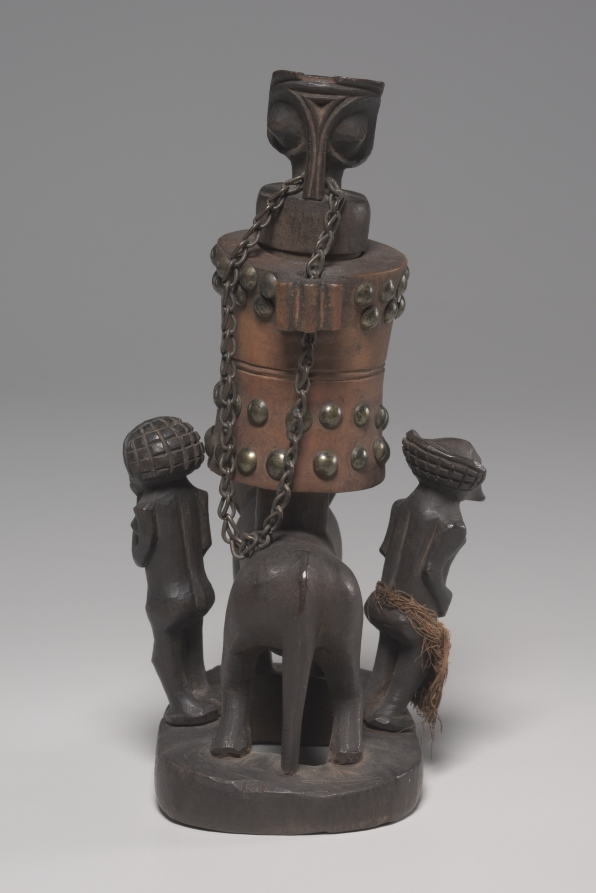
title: Snuff Mortar (Tesa Ya Ma Kanya)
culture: Africa, Central Africa, Angola or Democratic Republic of Congo, Chokwe carver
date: late 1800s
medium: Wood, upholstery studs, cloth, and metal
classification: Tool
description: Tobacco, introduced into Africa in the 16th century, became the prerogative of leaders. As patrons of the arts, Chokwe chiefs commissioned elaborate pipes and mortars as part of their court regalia for display during public gatherings.